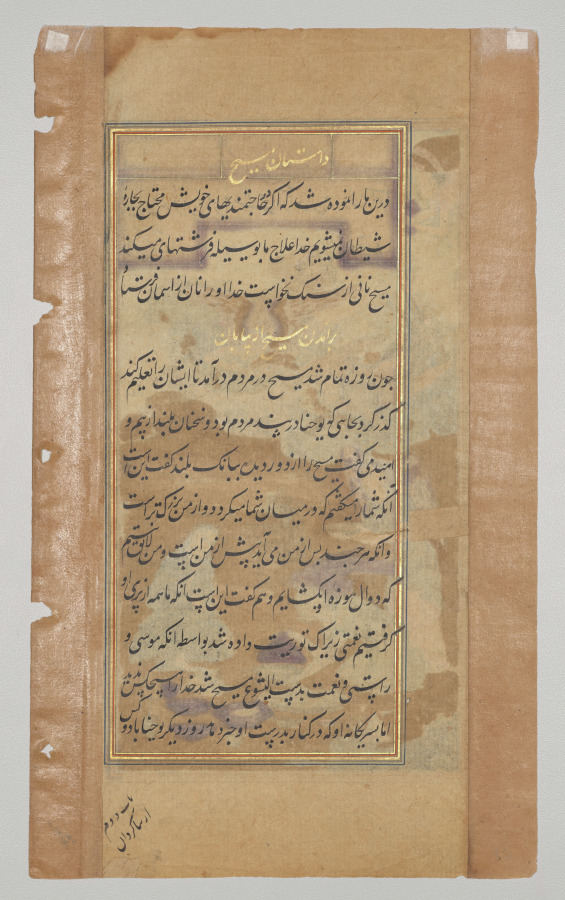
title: Angels bring food to Jesus in the wilderness (folio 55 recto), from a Mirror of Holiness (Mir’at al-quds) of Father Jerome Xavier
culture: Mughal India, Allahabad, made for Prince Salim (1569–1627)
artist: Muhammad Sharif (Indian, active c. 1600)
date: 1602–4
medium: Gum tempera, ink, color, and gold on paper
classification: Manuscript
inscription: Signature of the artist, Muhammad Sharif (Indian, active c. 1600), is written in the tiny pot by Jesus's foot.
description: To end his 40-day fast, five angels brought Jesus refreshments from heaven: breads, melons each with a knife for convenient cutting, fresh leeks, and what appear to be fragrant rice dishes and curries, along with cups of wine. Four of the angels are dressed in robes, and one is clothed only in feathers. After his baptism, Jesus spent 40 days and nights in the desert where he fasted, practiced spiritual exercises, and successfully resisted the temptations of Satan. Many of the rocks in this painting have faces, called grotesques. This page is the only surviving folio from this manuscript that has an artist’s signature, written in the tiny pot by Jesus’s foot.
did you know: The artist has put faces in the rocks, following a Persian convention.